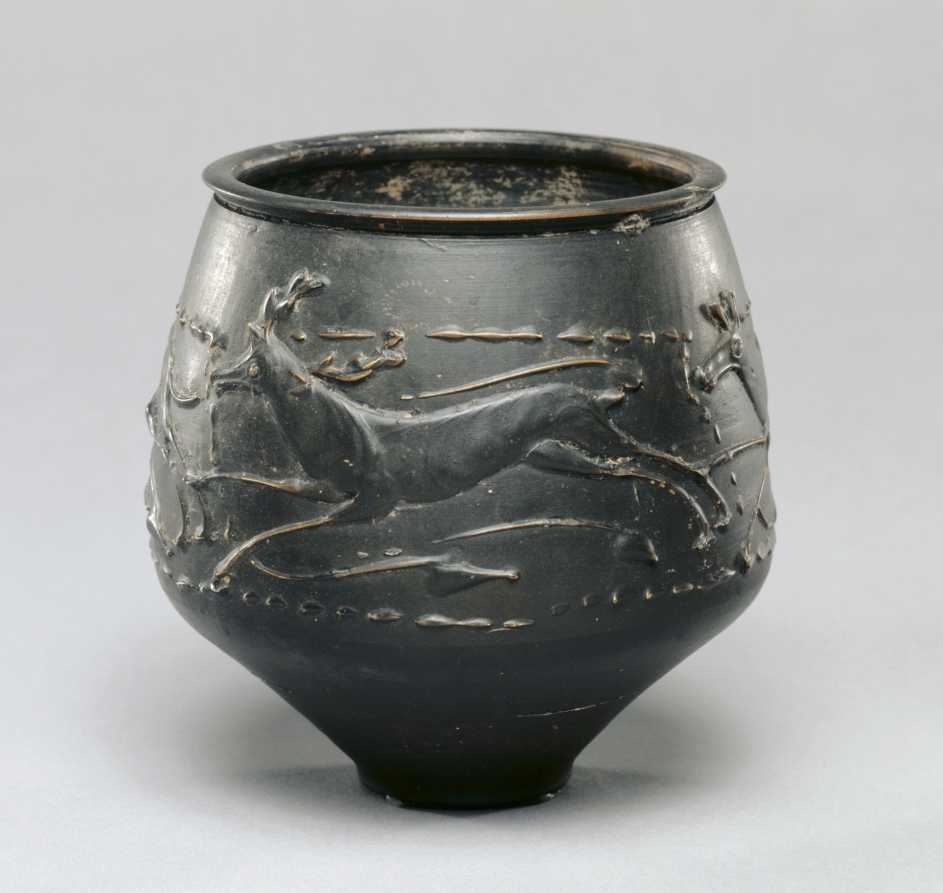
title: "Caster Ware" Vase with Hunt Scene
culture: Rhenish (Cologne), Gallo-Roman, mid-2nd Century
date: mid-100s CE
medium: reddish ware with black burnished slip and Barbotine decoration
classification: Ceramic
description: The wide body of this vase is decorated with a hunting scene in which a stag, doe, hare, and hound chase each other around the vessel. Dotted lines above and below the animals form a border around the scene, though the heads of the creatures occasionally poke above it. While larger barbotine decorations were usually mold made and applied to a leather-hard surface, the figures on our pot were piped on by hand.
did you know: “Hunt cups” like this one were a specialty of artisans working in Roman Cologne during the 2nd century CE.